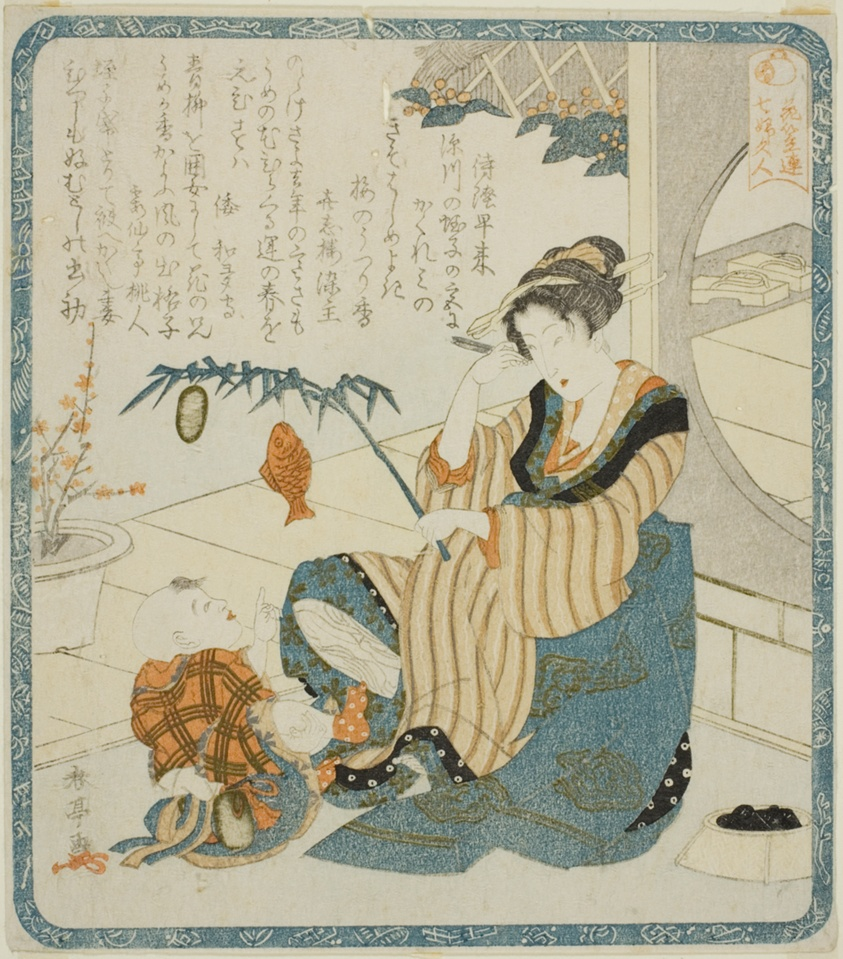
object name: Print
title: A Woman as Ebisu, from the series "Seven Women as the Gods of Good Fortune for the Hanagasa Poetry Club (Hanagasaren shichifukujin)"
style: Japanese (culture or style)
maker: Katsukawa Shuntei (Japanese, 1770-1824)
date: c. 1820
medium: Color woodblock print; shikishiban, surimono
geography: Japan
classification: woodblock print; print; asian art